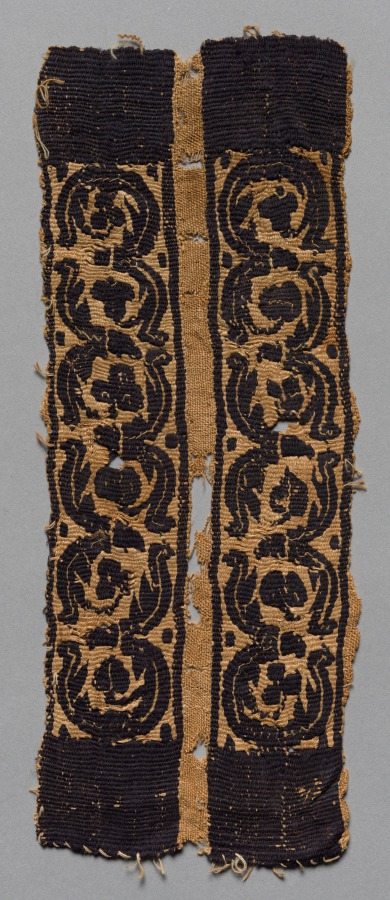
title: Sleeve Band from a Tunic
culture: Egypt, Byzantine period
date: 400s - 500s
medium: tabby weave with inwoven tapestry ornament, linen and wool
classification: Textile